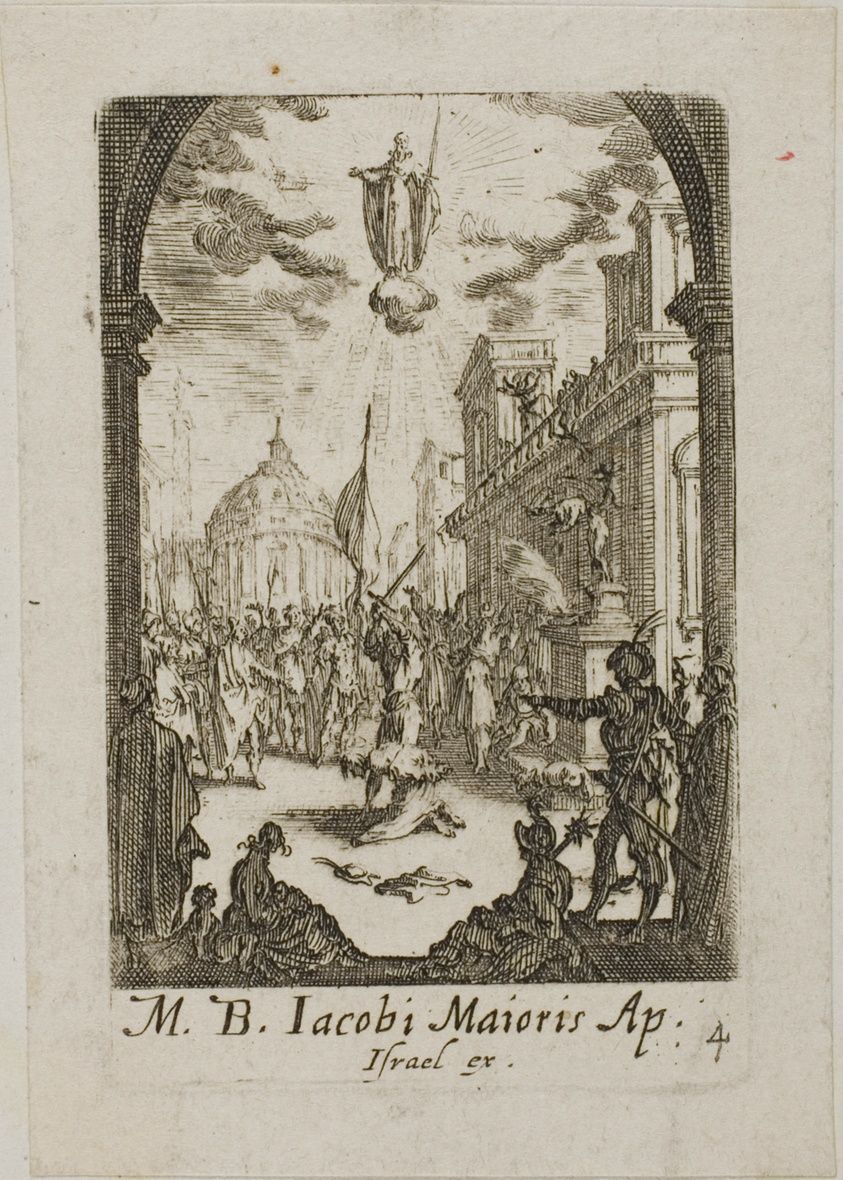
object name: Print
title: Martyrdom of Saint James the Major, plate four from The Martyrdoms of the Apostles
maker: Jacques Callot (French, 1592-1635)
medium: Etching on paper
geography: France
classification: etching; print; prints and drawing